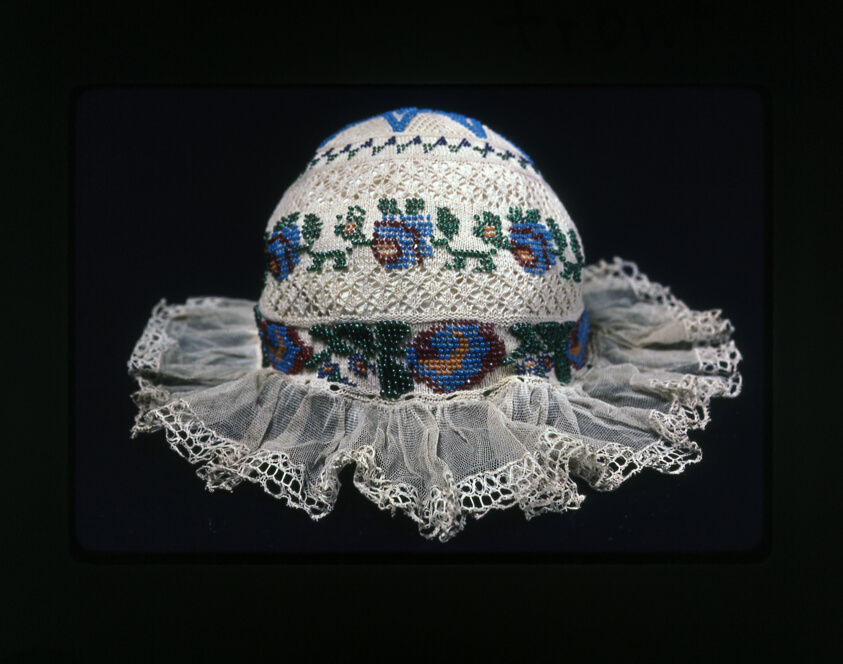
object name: Costume and Accessories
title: Child's Cap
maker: Europe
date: 19th century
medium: Cotton, plain knitting with cotton bobbin lace; edged with linen bobbin lace; cotton, plain weave ties; glass beads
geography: Europe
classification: textile; headdress - misc; costume accessory - headdress; costume - lace; lace - bobbin; costume